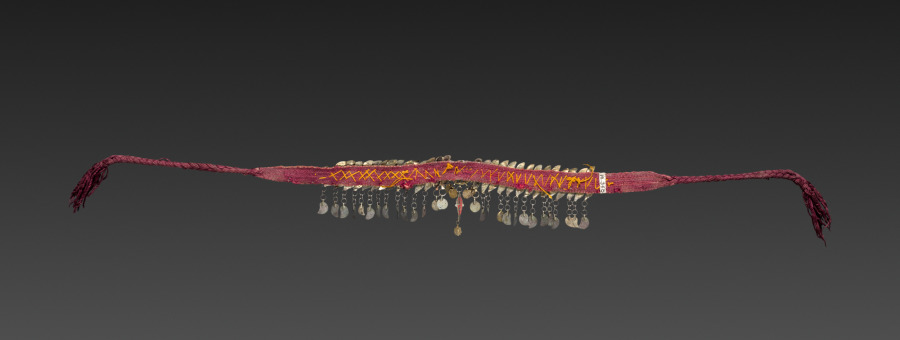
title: Necklace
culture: Bulgaria, 19th century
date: 1800s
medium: silver gilt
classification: Jewelry